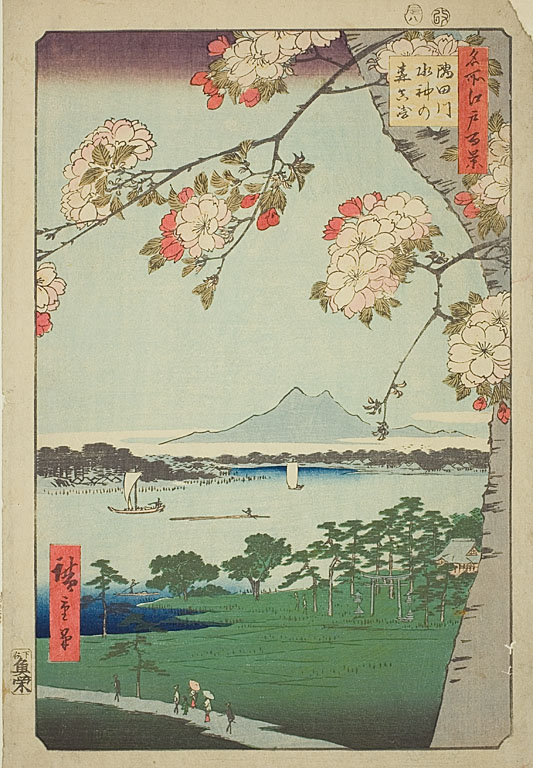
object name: Print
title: Suijin Shrine and Massaki on the Sumida River (Sumidagawa Suijin no mori Massaki), No.35 from the series "One Hundred Famous Views of Edo (Meisho Edo hyakkei)"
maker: Utagawa Hiroshige (Japanese, 1797-1858)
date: 1856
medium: Color woodblock print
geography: Japan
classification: woodblock print; print; asian art